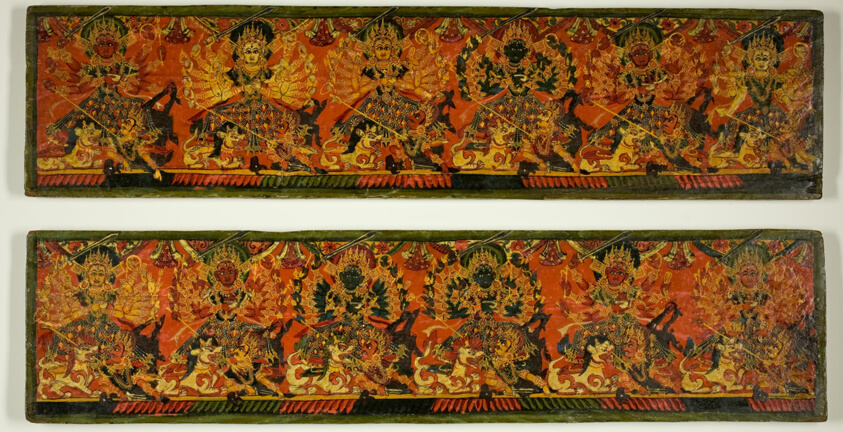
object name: Painting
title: One of a Pair of Manuscript Covers from the Glorification of the Great Goddess (Devimahatmya)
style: Himalayan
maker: Nepal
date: 18th century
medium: Pigments and metallic paint on wood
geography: Nepal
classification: painting